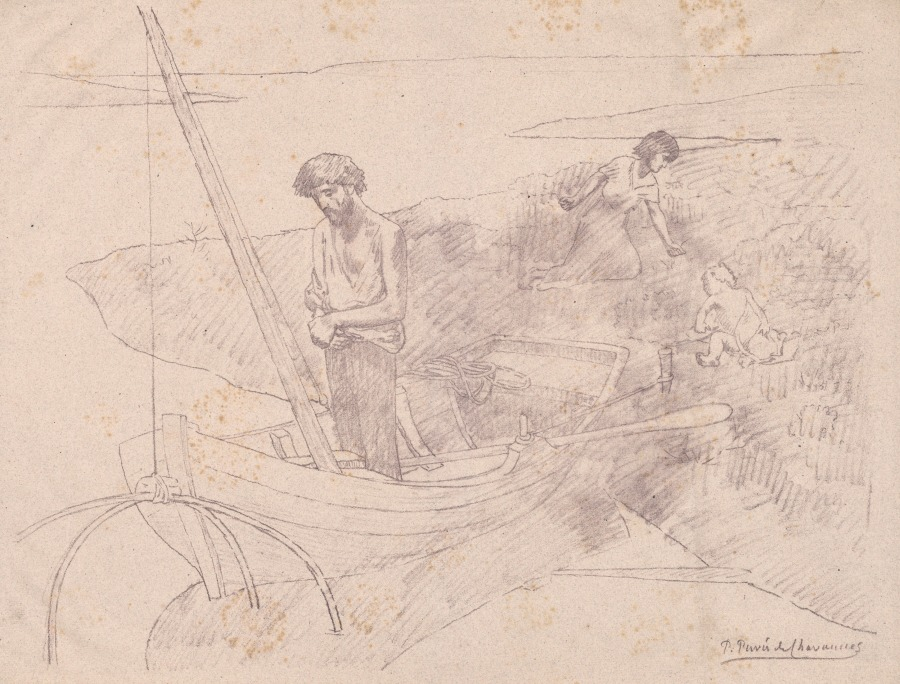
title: The Poor Fisherman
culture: France, 19th century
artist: Pierre Puvis de Chavannes (French, 1824–1898)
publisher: Ambroise Vollard (French, 1867–1939)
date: 1897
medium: color lithograph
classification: Print